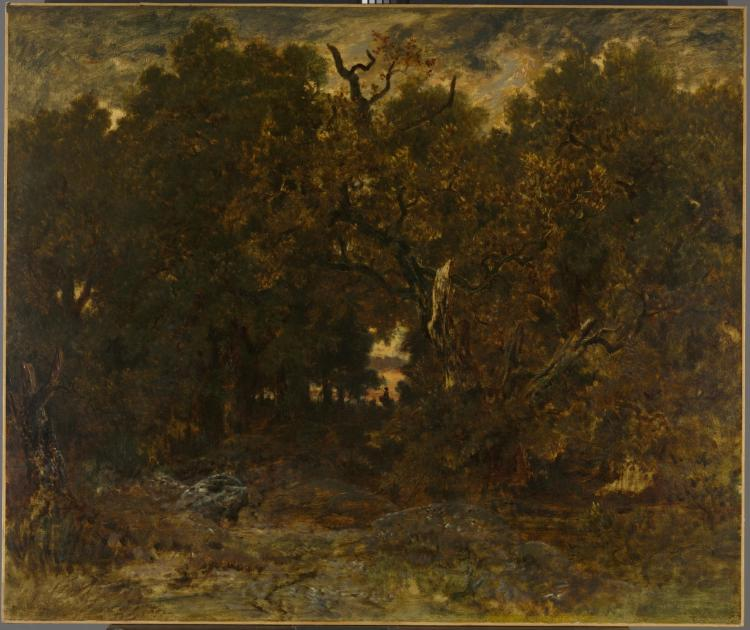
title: Leaving the Forest, Fontainebleau: Setting Sun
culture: France, 19th century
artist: Théodore Rousseau (French, 1812–1867)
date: 1851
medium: oil on fabric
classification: Painting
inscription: Signed lower left: T. H. Rousseau